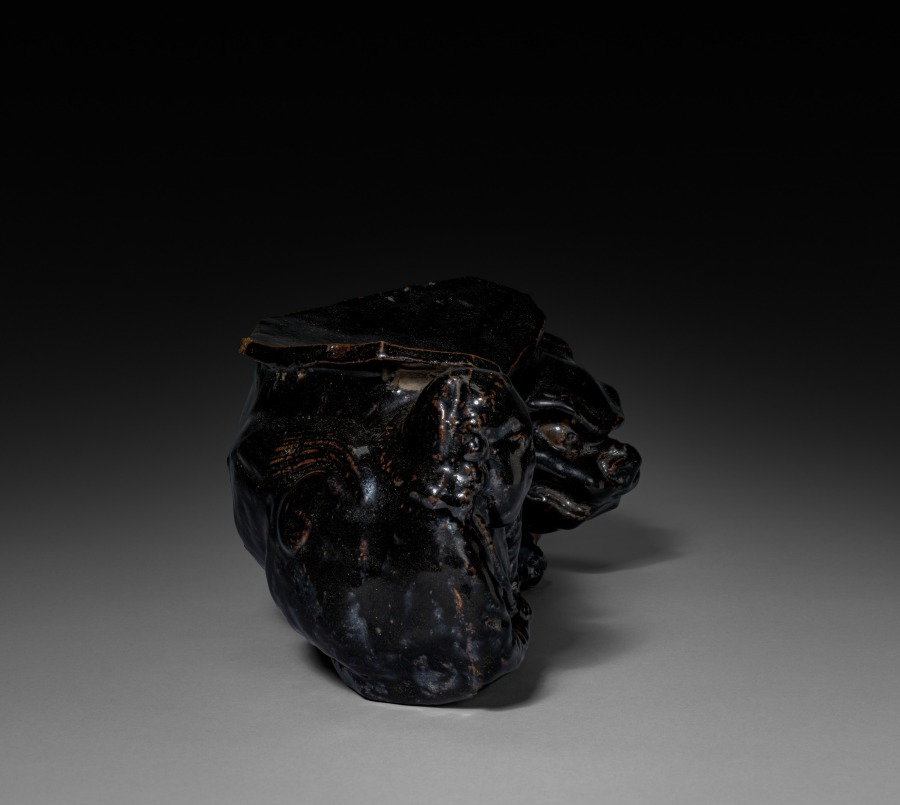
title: Pillow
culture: China, Yuan dynasty (1271-1368)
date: 1100s-1200s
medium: Glazed stoneware, Cizhou ware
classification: Ceramic